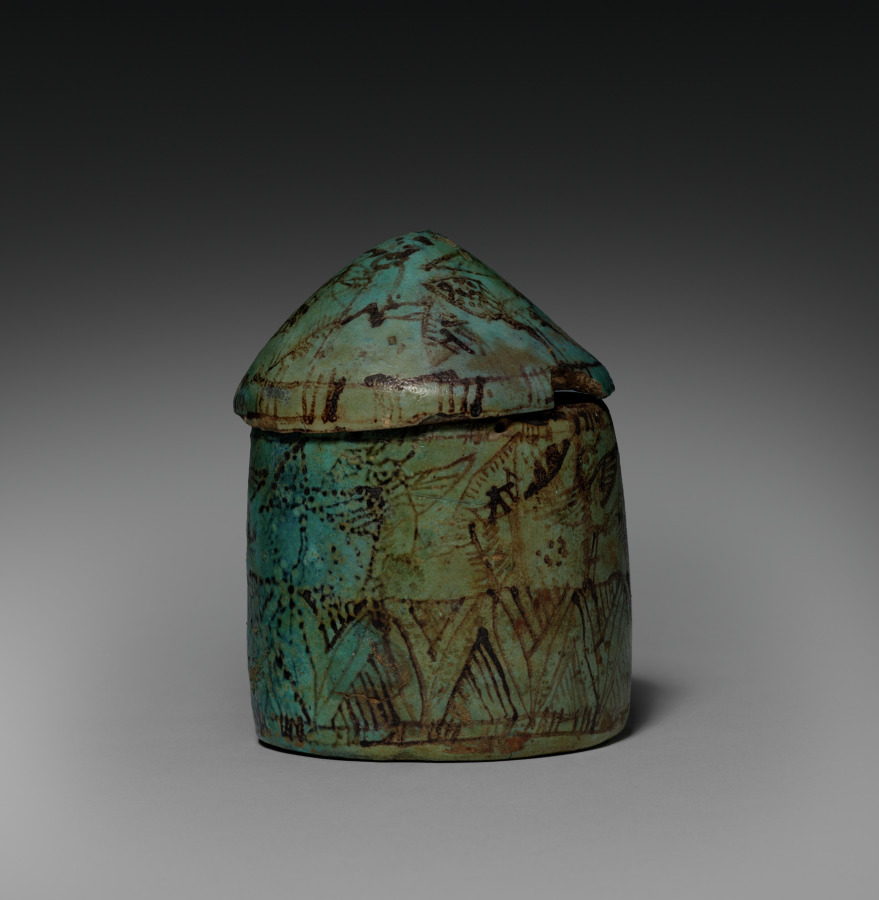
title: Pyxis with Lid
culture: Egypt, Middle Kingdom (2040–1648 BCE)–New Kingdom (1540–1069 BCE)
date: c. 1901–1525 BCE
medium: turquoise faience with black decoration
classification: Vessels